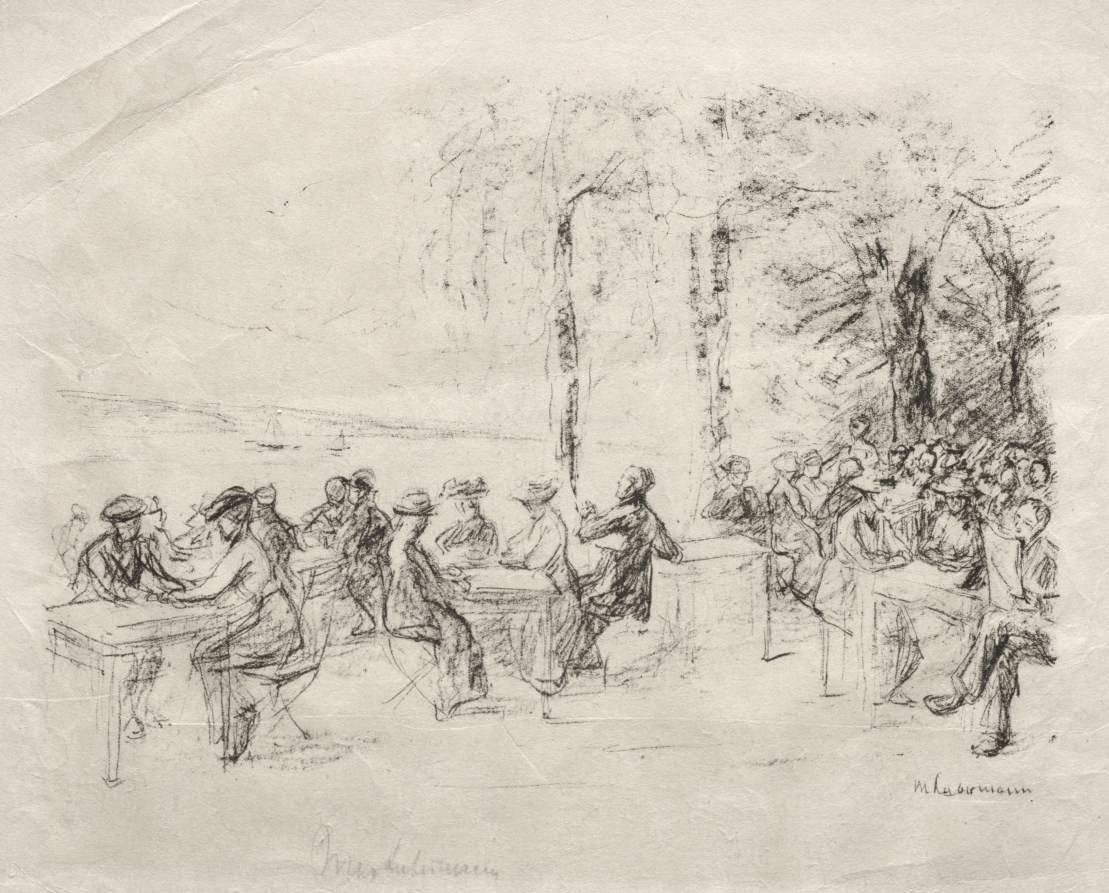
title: Cafe on the Havel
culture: Germany, 19th-20th century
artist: Max Liebermann (German, 1847–1935)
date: 1916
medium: lithograph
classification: Print